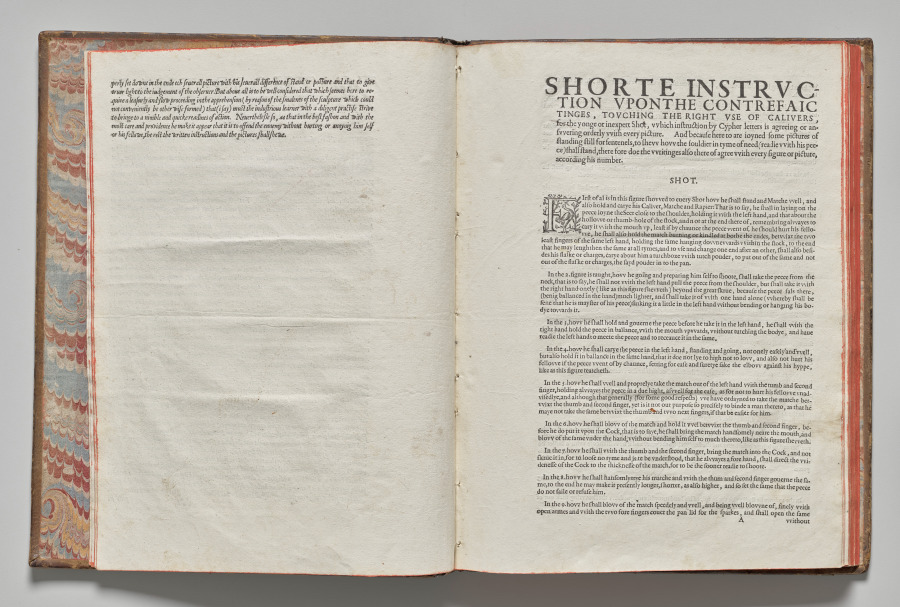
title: The Exercise of Armes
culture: Netherlands, The Hague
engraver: Jacob de Gheyn II (Netherlandish, 1565–1629)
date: 1607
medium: leather bound paper, 117 engraved plates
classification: Bound Volume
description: The Exercise of Armes, published in 1607–8, is one of the most famous manuals of arms. Jacob De Gheyn's book became popular all over Europe and was quickly translated into several languages. Its 117 copper engravings portray the step-by-step sequence for training foot soldiers in the handling of standard weaponry of 17th-century warfare: muskets, matchlock or calivers, and pikes.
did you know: The depiction of the soldiers in this book inspired Rembrandt when painting his famous The Night Watch.